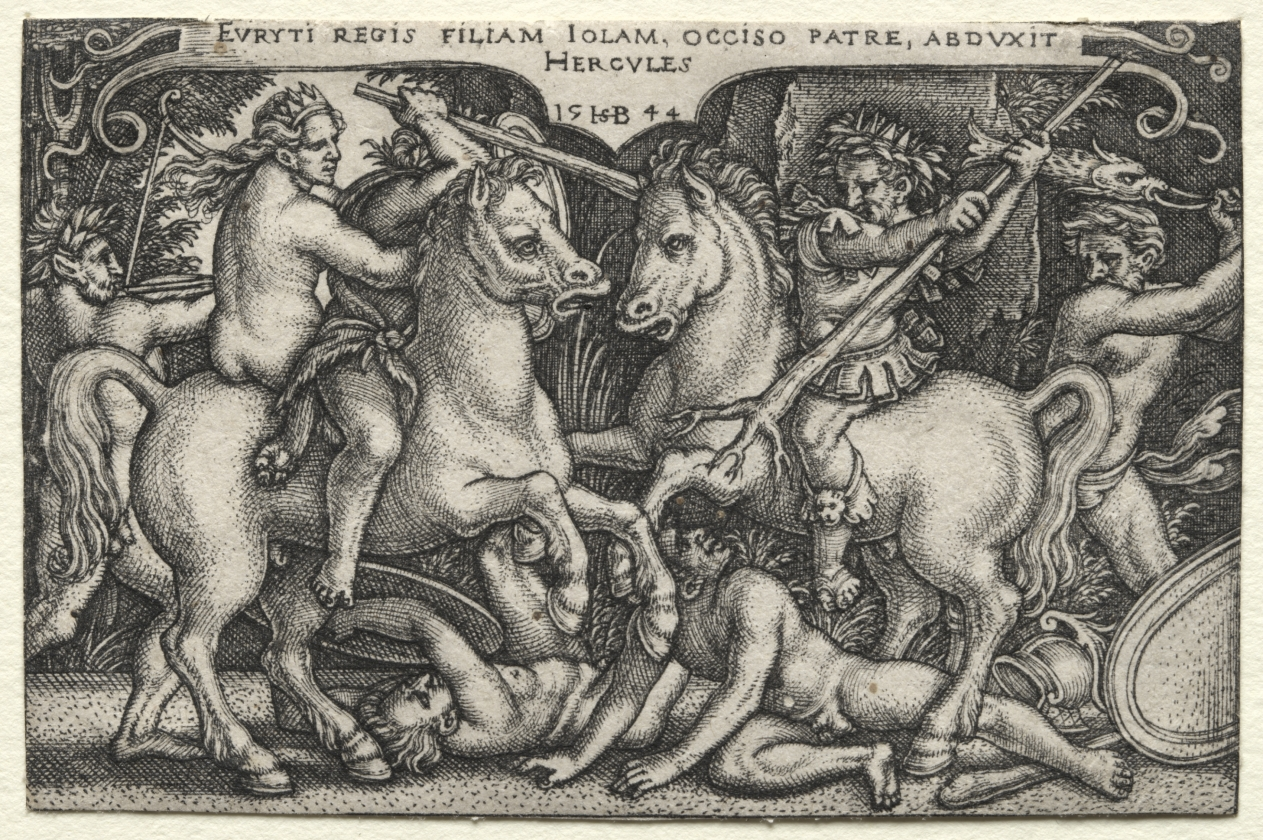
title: The Labors of Hercules: Hercules Abducting Iole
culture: Germany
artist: Hans Sebald Beham (German, 1500–1550)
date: 1544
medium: engraving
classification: Print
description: Beham was one of several German printmakers referred to today as the “Little Masters.” They established their artistic prowess by engraving remarkably small prints, appealing to collectors fascinated with miniature objects and curiosities. Here, Beham has packed 12 larger-than-life stories of the mighty Hercules into tiny prints. The series includes three of the 12 labors Hercules performed as penance for slaying his children in a fit of madness: Strangling the Nemean Lion, Killing the Lernean Hydra, and Dragging Cerberus from the Underworld. The other scenes depict tales from his life and the events preceding his death. The son of Jupiter and the mortal Alcmena, Hercules was both man and god. His saga of moral and physical trials made him one of the most popular classical heroes in Renaissance art.